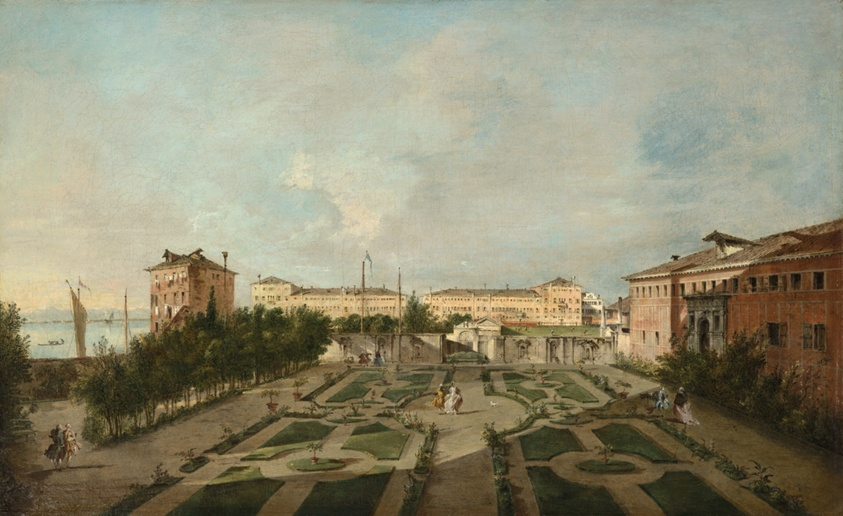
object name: Painting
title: The Garden of Palazzo Contarini dal Zaffo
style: 18th Century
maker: Francesco Guardi (Italian, 1712–1793)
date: Late 1770s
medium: Oil on canvas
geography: Italy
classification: oil on canvas; Italian; oil paintings (visual works); paint; painting; european painting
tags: Venice, Italy, water, landscape, building, buildings, clouds, figures, flowers, foliage, house, houses, Italy, men, ships, sky, trees, women, gardens